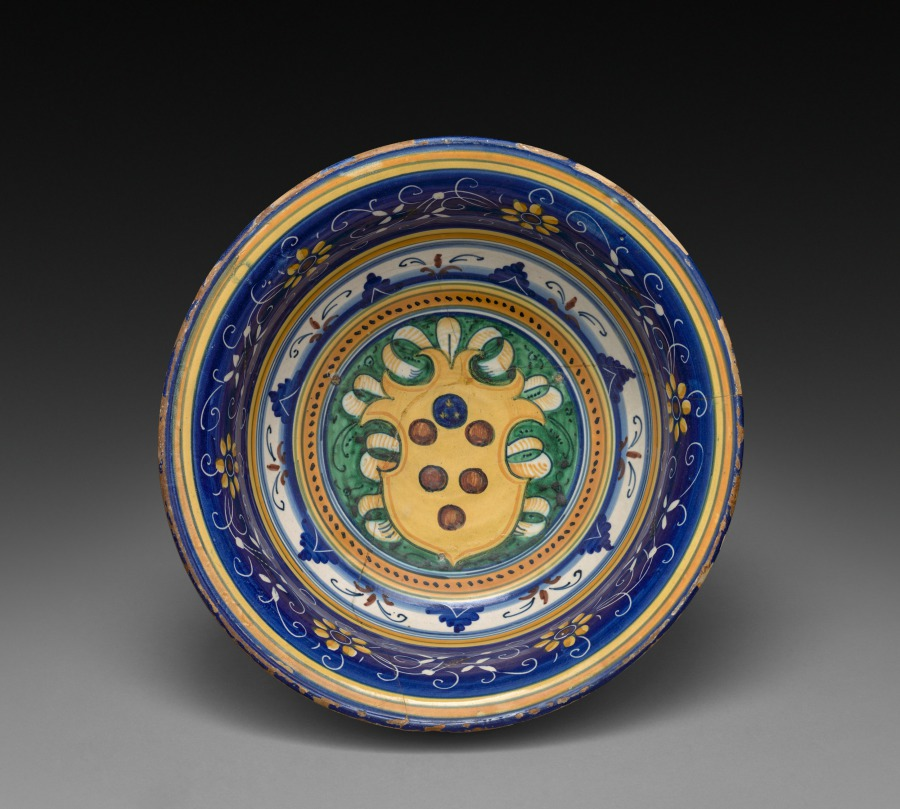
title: Bowl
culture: Italy, 16th century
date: c. 1520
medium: tin-glazed earthenware (maiolica)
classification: Ceramic